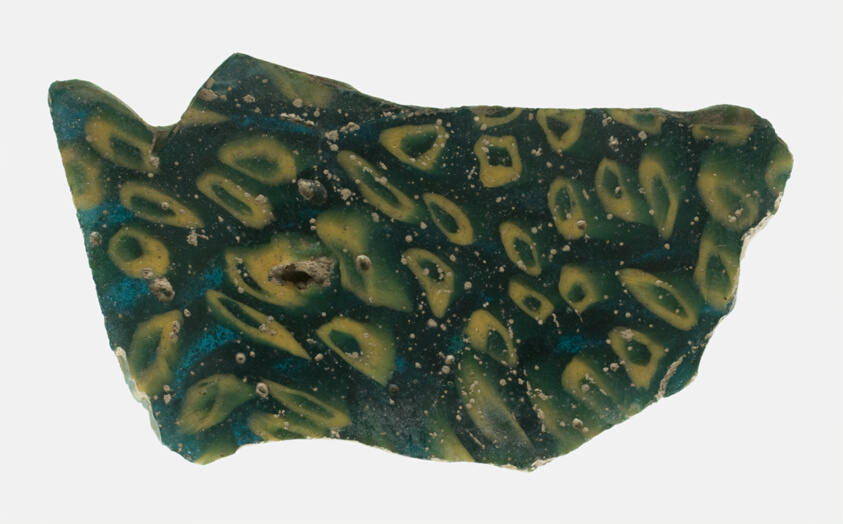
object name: Decorative Arts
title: Fragment of a Revetment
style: roman (ancient, style or period), ancient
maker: Roman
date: 1st century BCE–1st century CE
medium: Glass, mosaic glass technique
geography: Roman Empire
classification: fragment; decorative arts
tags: decoration